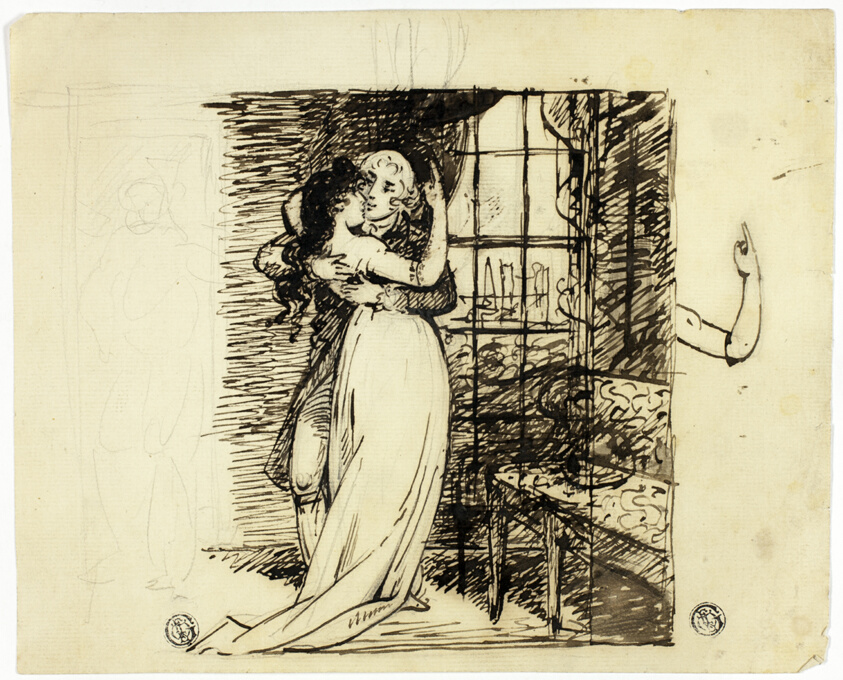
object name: Drawing and Watercolor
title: Lovers in a Room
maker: John Downman (English, 1750-1824)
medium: Pen and brown ink, with graphite, on cream laid paper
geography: England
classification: pen and ink drawings; drawings (visual works); prints and drawing